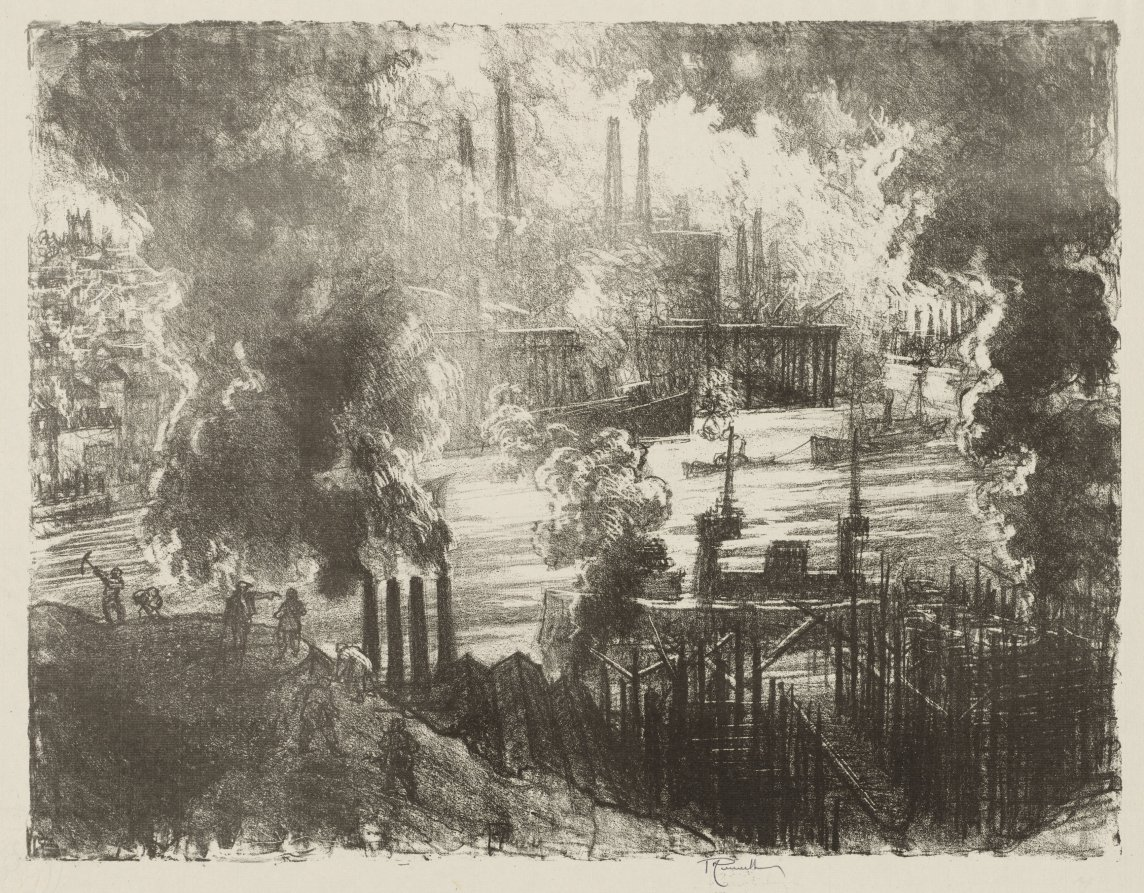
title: English War Work: Munitions River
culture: America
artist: Joseph Pennell (American, 1857–1926)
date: 1916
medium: lithograph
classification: Print